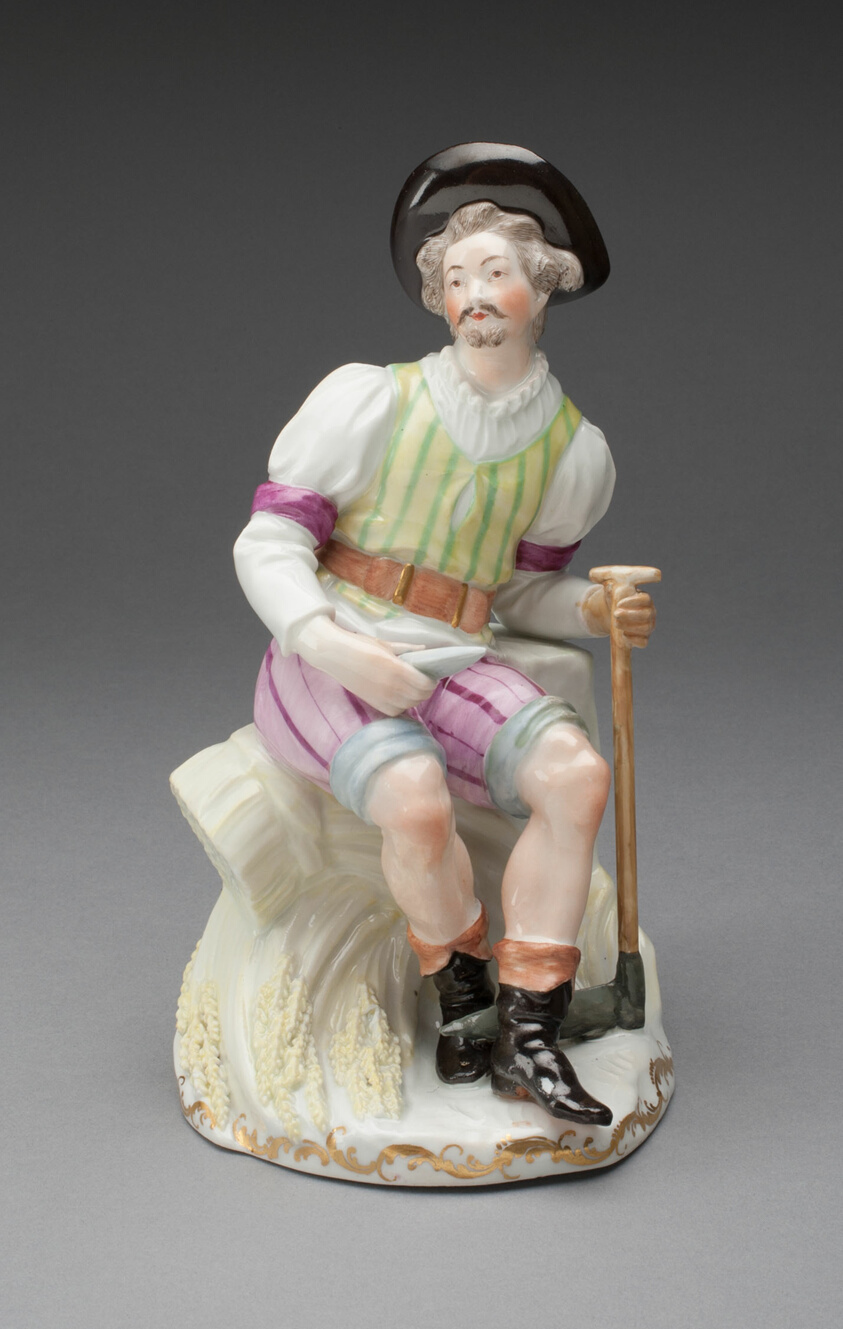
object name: Ceramics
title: Figure of Summer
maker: Vienna State Porcelain Manufactory (Austrian, 1744-1864)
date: c. 1770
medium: Hard-paste porcelain, polychrome enamels, and gilding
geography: Vienna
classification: ceramics